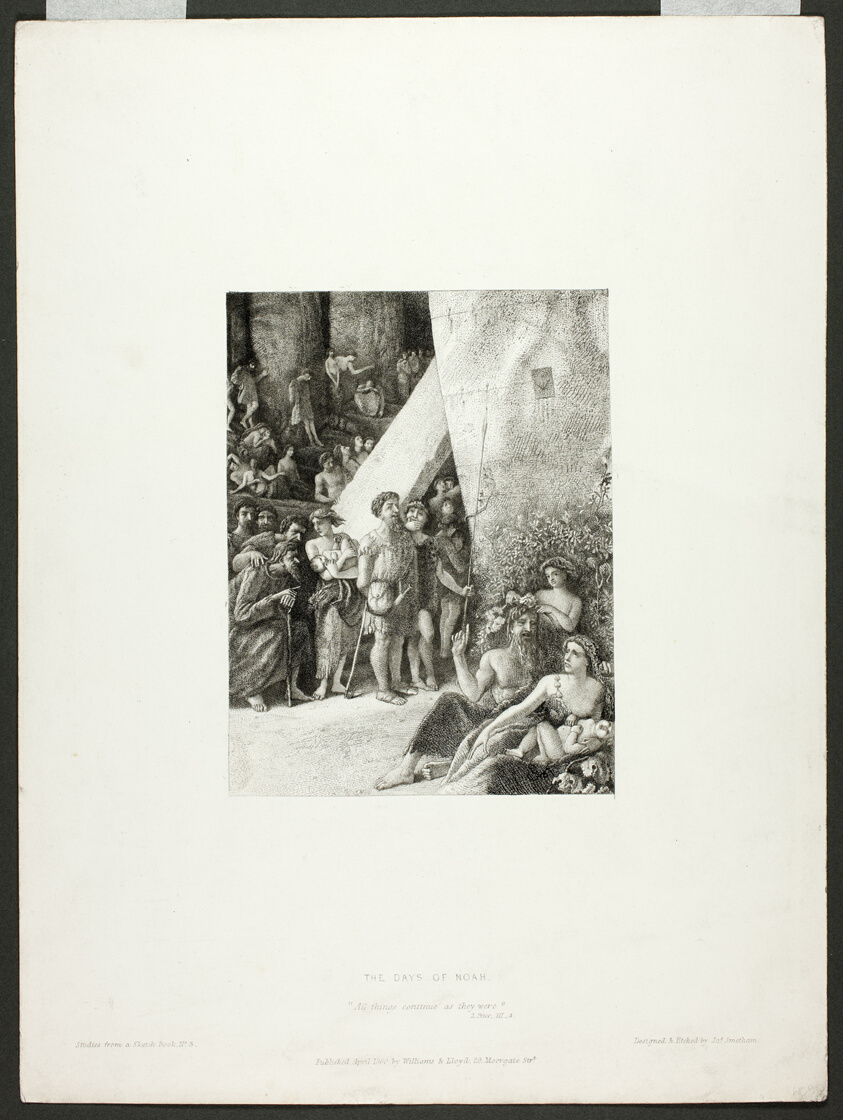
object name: Print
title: The Days of Noah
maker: James Smetham (English, 1821-1889)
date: 1860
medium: Etching on ivory wove paper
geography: England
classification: etching; print; prints and drawing